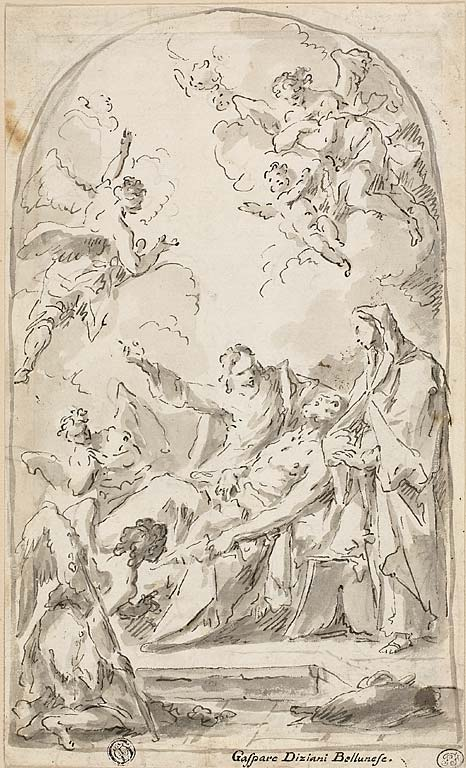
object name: Drawing and Watercolor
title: Death of Saint Joseph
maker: Attributed to Gaspare Diziani; Italian, 1689-1767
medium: Pen and black ink with brush and gray wash, over traces of black chalk, on ivory laid paper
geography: Italy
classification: pen and ink drawings; drawings (visual works); prints and drawing